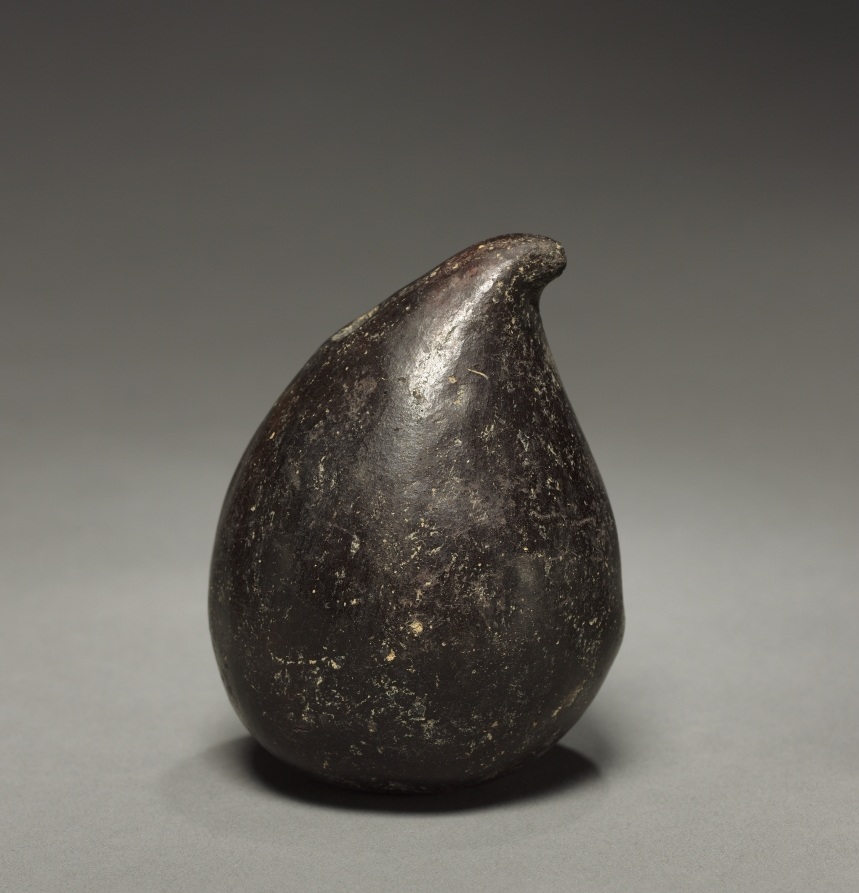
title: Fruit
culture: Colombia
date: before 1921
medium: pottery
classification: Ceramic